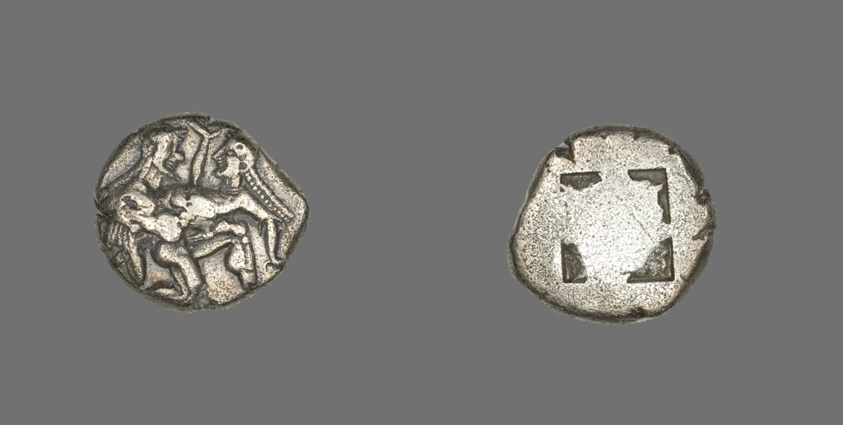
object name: Coin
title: Stater (Coin) Depicting a Satyr and Nymph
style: greek, ancient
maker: Greek, minted in Thasos, Thrace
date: 500-463 BCE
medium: Silver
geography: Thásos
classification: coin; ancient art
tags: satyr, mythological figures